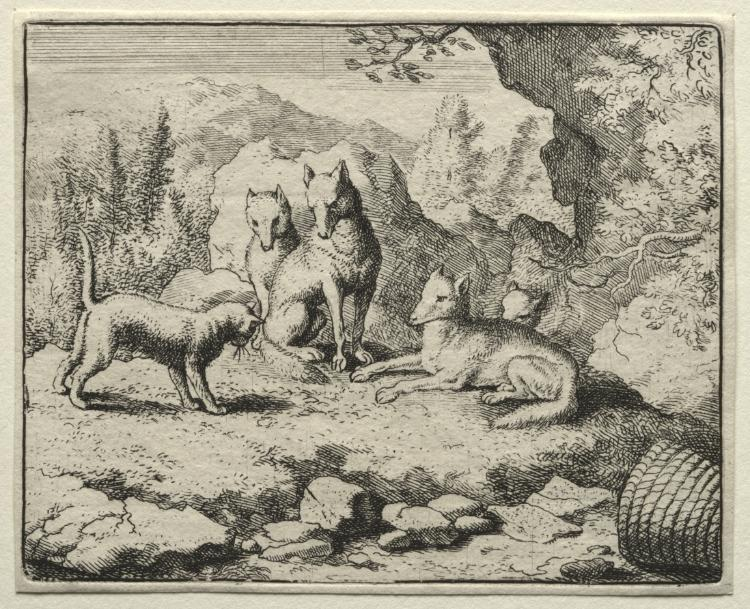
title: Reynard the Fox: The Cat Calls Reynard to Court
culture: Netherlands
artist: Allart van Everdingen (Dutch, 1621–1675)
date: 1650–75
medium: etching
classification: Print